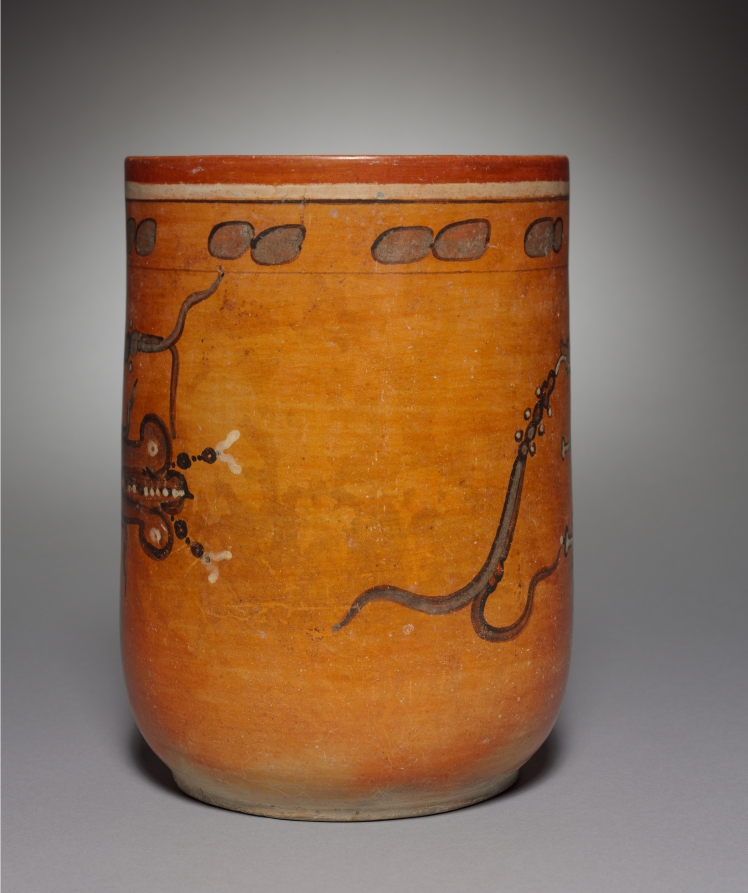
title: Vase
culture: Mexico, Maya, Campeche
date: 250–900 CE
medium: earthenware with colored slips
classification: Ceramic